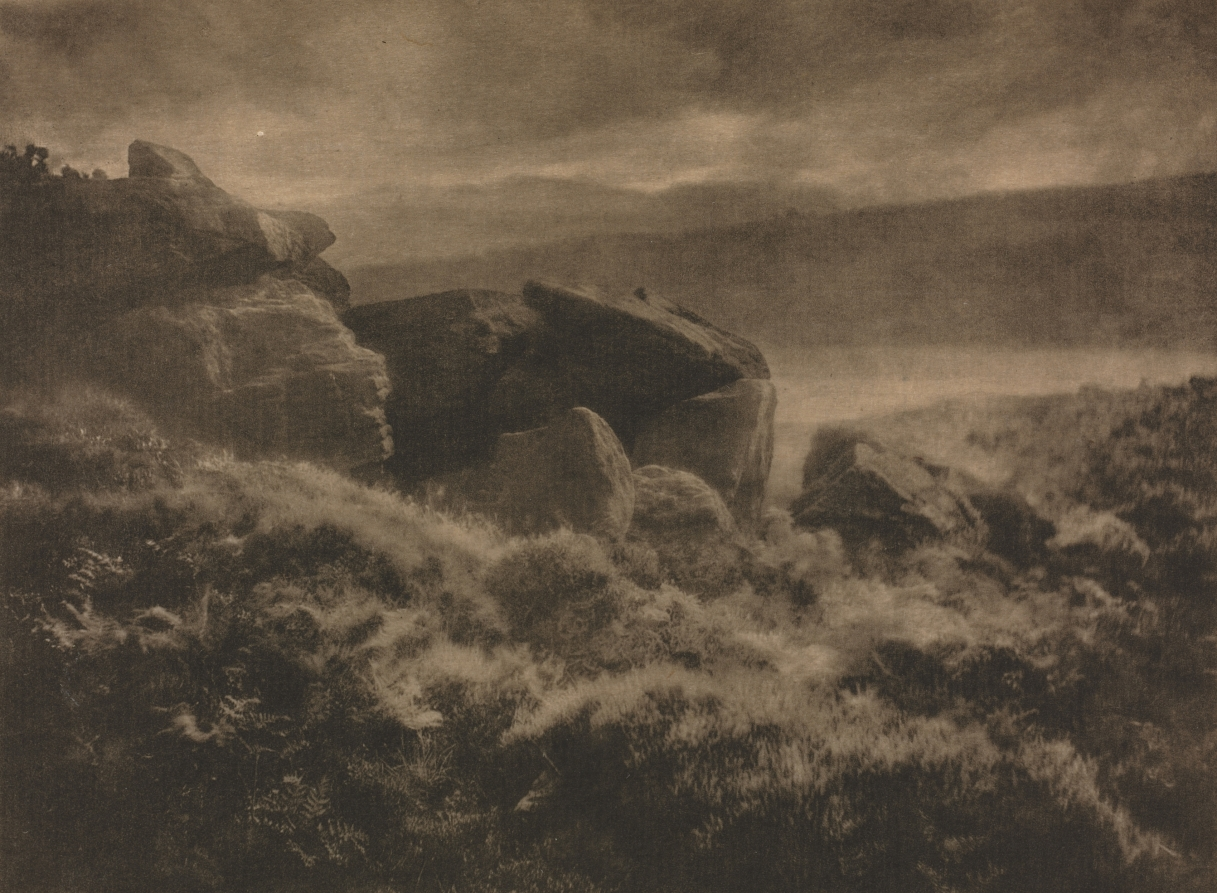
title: Camera Work: Rain from the Hills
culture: England, 20th century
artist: A. Horsley Hinton (British, 1863–1908)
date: 1905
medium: photogravure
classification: Bound Volume